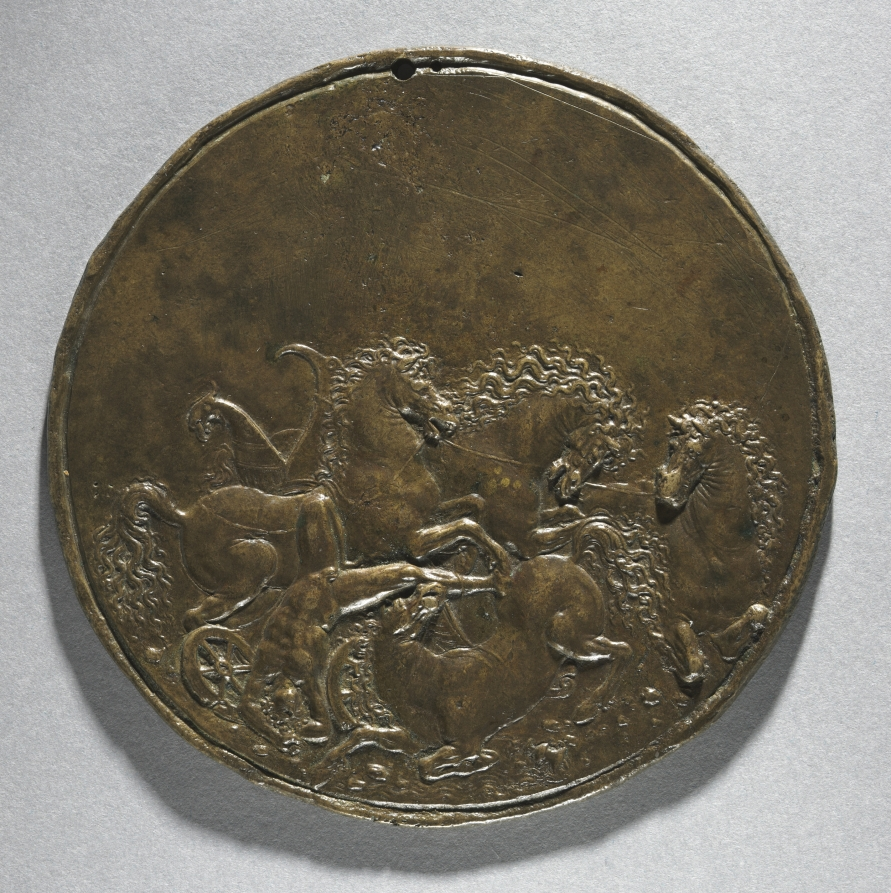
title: The Death of Hippolytus or Fall of Phaeton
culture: Italy, 16th century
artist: Moderno (Italian, 1467–1528)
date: 1500s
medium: bronze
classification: Sculpture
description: This composition's drama comes from the horses' twisting bodies—rhythmically fitting in the circular frame—as well as their dynamic and individuated expressions. Many copies and variants of this popular design exist, some with architectural or wooded backgrounds. Yet, the subject matter is still being debated. The waves along the bottom edge recall two possible classical narratives that relate to bodies of water. First, Hippolytus, sent into exile for the false accusation that he was responsible for his stepmother's death, was killed when Poseidon sent monsters to drown the young man and his chariot in the sea. However, the plaquette has also been connected to Phaeton, the son of Apollo, who attempted to drive the sun god's chariot. Because Phaeton was unable to control the reins, Zeus struck the youth with a bolt of lightning-saving the earth, but hurtling the young boy and horses into the river Eridanos.